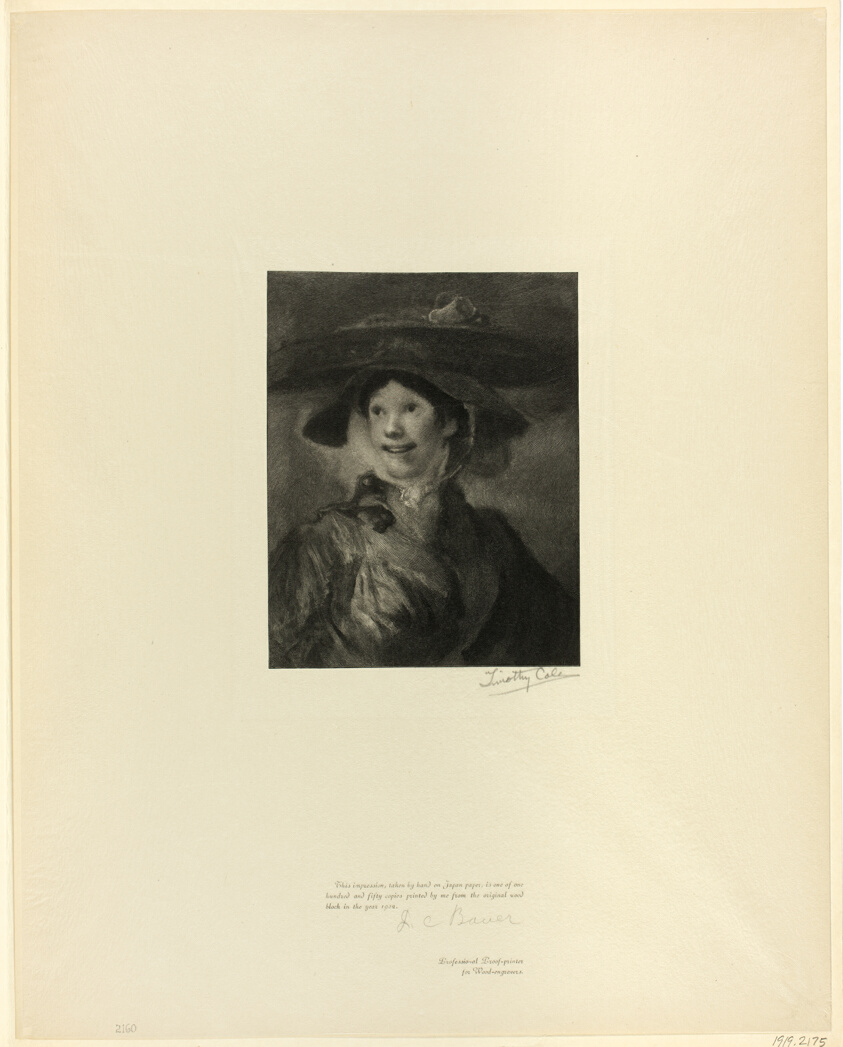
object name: Print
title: The Shrimp Girl, from Old English Masters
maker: Timothy Cole (American, born England, 1852-1931); after William Hogarth (English, 1697-1764)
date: 1896; printed 1902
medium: Wood engraving on chine paper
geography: United States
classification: wood engraving; print; prints and drawing